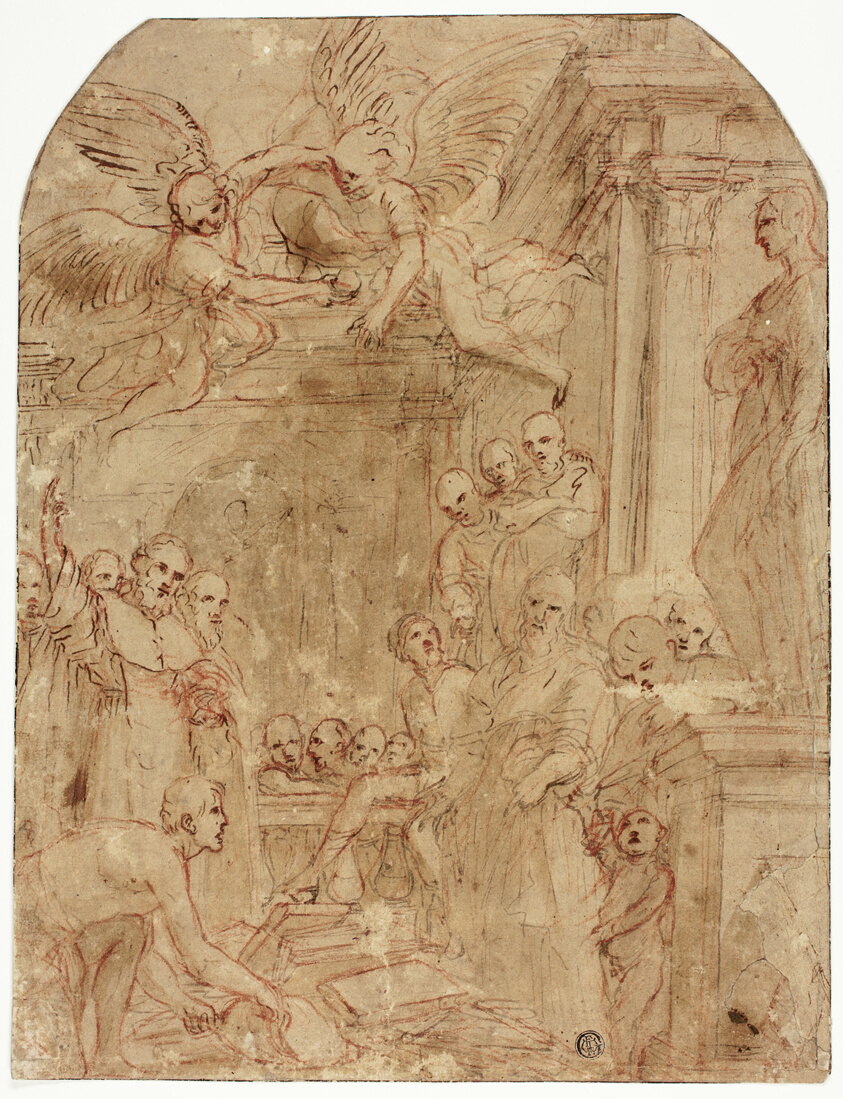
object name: Drawing and Watercolor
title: Study for the Trial of Saint Dominic's and Albigensian Books by Fire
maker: Leonello Spada (Italian, 1576-1622)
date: 1614/16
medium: Pen and brown ink, with brush and brown wash, over red chalk, on brown laid paper, laid down on ivory laid paper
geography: Italy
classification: pen and ink drawings; drawings (visual works); prints and drawing